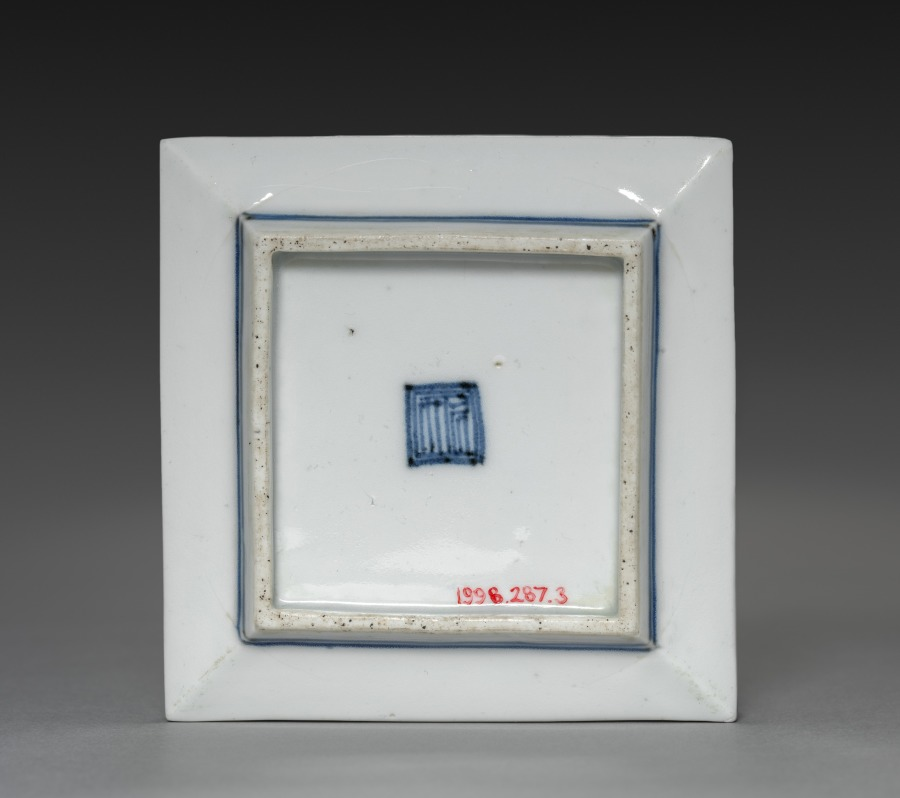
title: Side-Dish with Dandelion in Rocks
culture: Japan, Edo period (1615–1868)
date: 1700s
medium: One of a set of five dishes; porcelain with underglaze blue and overglaze iron oxide (Arita ware, Kutani style)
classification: Ceramic